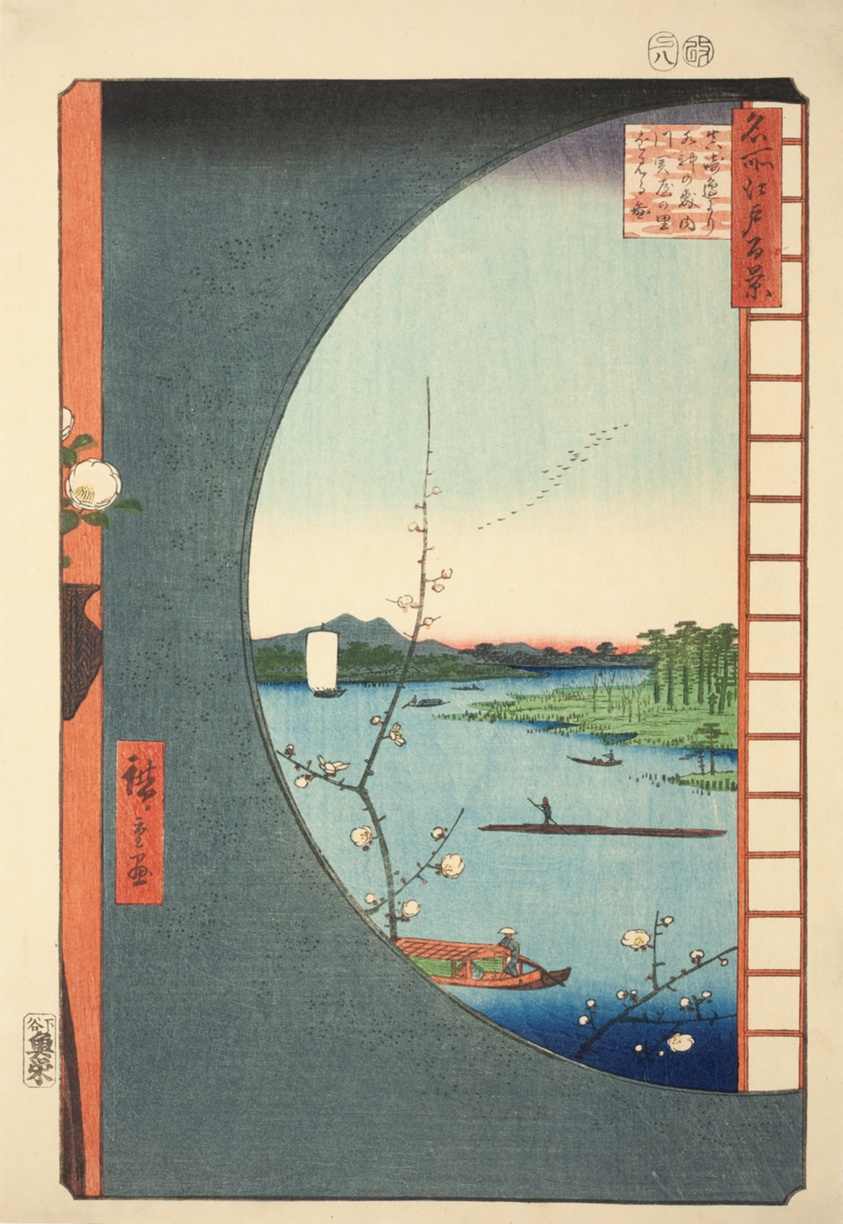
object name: Print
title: View from Massaki of Suijin Shrine, Uchigawa Inlet, and Sekiya (Massaki hen yori Suijin no mori Uchigawa Sekiya no sato o miru zu), from the series "One Hundred Famous Views of Edo (Meisho Edo hyakkei)"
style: Japanese (culture or style)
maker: Utagawa Hiroshige 歌川 広重; Japanese, 1797-1858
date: 1857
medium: Color woodblock print; oban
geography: Japan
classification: woodblock print; print; asian art